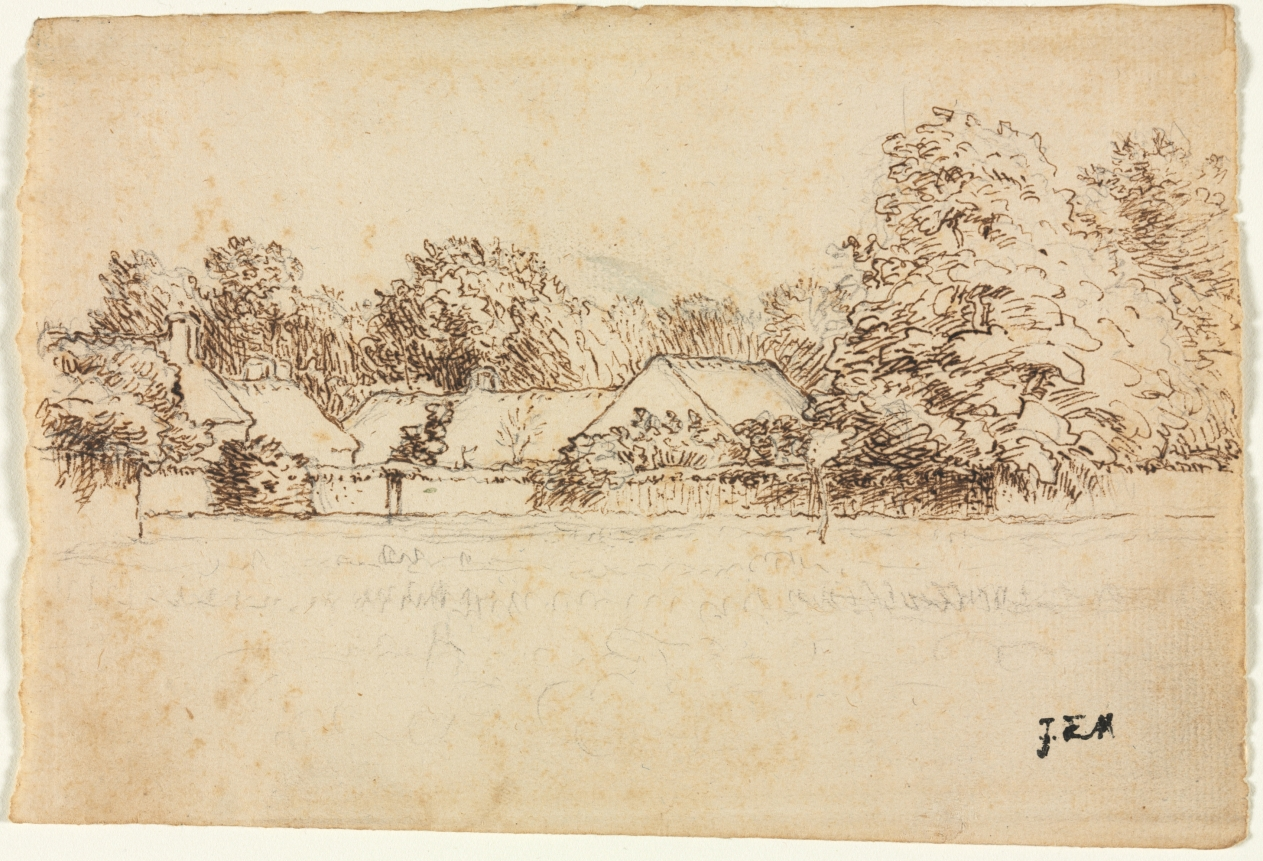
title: Cottages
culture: France, 19th century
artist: Jean-François Millet (French, 1814–1875)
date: 1870–71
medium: pen and brown ink and graphite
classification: Drawing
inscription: verso, lower right, in graphite: 5186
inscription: lower right, in graphite?: [illegible, partially erased]